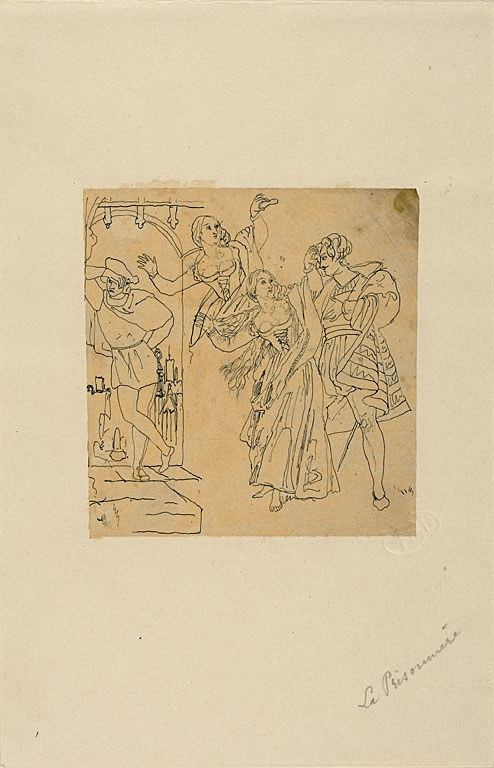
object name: Drawing and Watercolor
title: The Prisoner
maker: Rodolphe Bresdin (French, 1825-1885)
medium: Pen and black ink, on tan tracing paper, laid down on buff wove paper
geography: France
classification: pen and ink drawings; drawings (visual works); prints and drawing